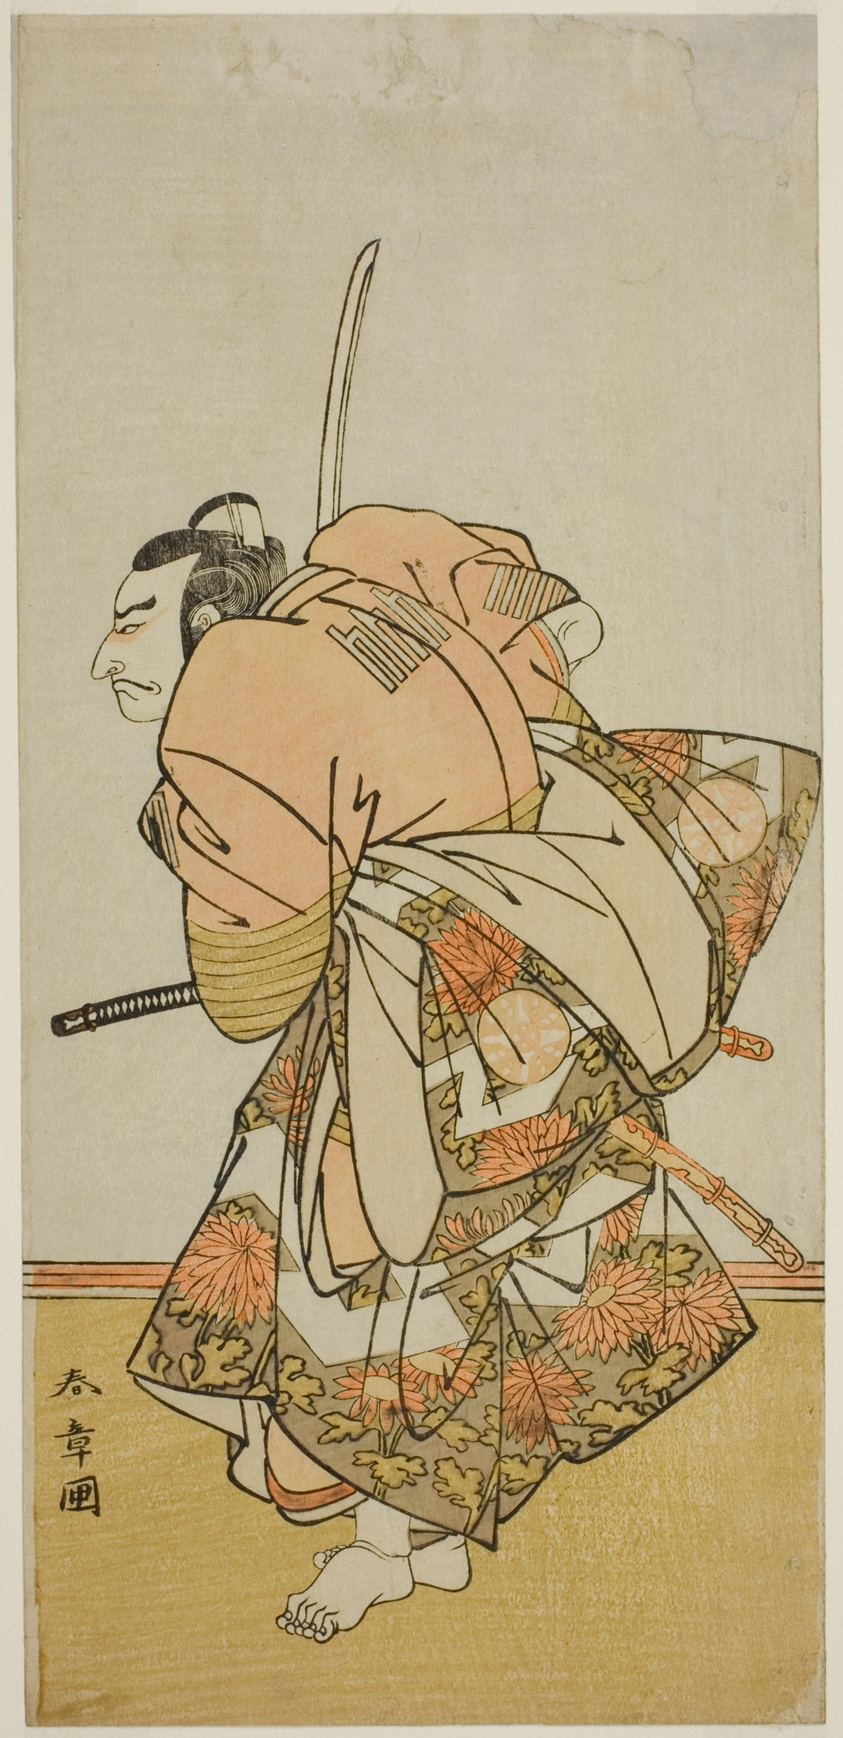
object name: Print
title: The Actor Nakamura Nakazo I as Chinzei Hachiro Tametomo in the Play Hana-zumo Genji Hiiki, Performed at the Nakamura Theater in the Eleventh Month, 1775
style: Japanese (culture or style)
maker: Katsukawa Shunsho 勝川 春章; Japanese, 1726-1792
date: c. 1775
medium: Color woodblock print; hosoban; right sheet of diptych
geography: Japan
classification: woodblock print; print; asian art